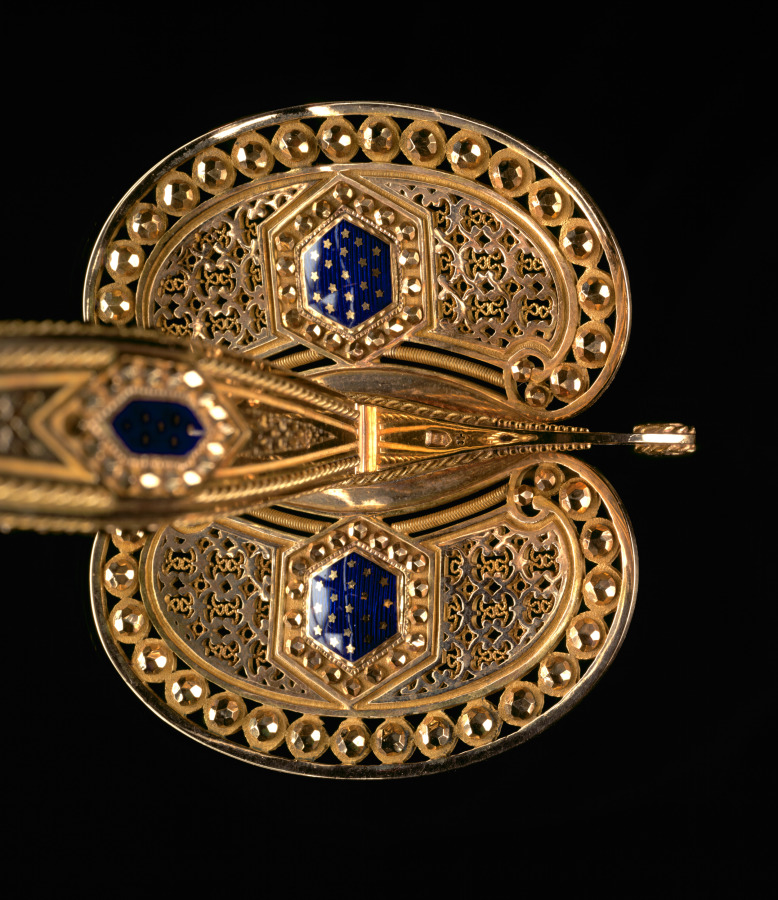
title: Small-Sword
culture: Switzerland, Geneva(?) (blade: Germany, Solingen, early 18th c.), late 18th Century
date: c. 1790–1800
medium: hilt: gold with blue translucent enamel; blade: etched, blued and gilded steel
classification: Arms and Armor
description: This example shows the small-sword at its latest and most refined stage of development. Though highly reflective of French taste, it was probably fashioned in a Swiss workshop under French influence or by a French craftsman working in Switzerland. Worn publicly as an emblem of social rank, this sword was likely custom-made for an affluent individual to use on formal or court occasions. So-called because of its short blade, the small-sword emerged as the light and quick weapon of choice for aristocratic civilians during the 1700s. Such a sword was traditionally suspended at about mid-thigh from the left side of a belt, the hilt exposed through the opening of the gentleman's coat. Highly visible, the hilt invited lavish decoration through precious materials such as gold and enamels, as seen here. Considered a type of masculine jewelry at that time, small-swords featured a variety of hilt styles that went in and out of fashion. Many were decorated to match personal costume, and jewelers worked on the finest small-swords of the day.